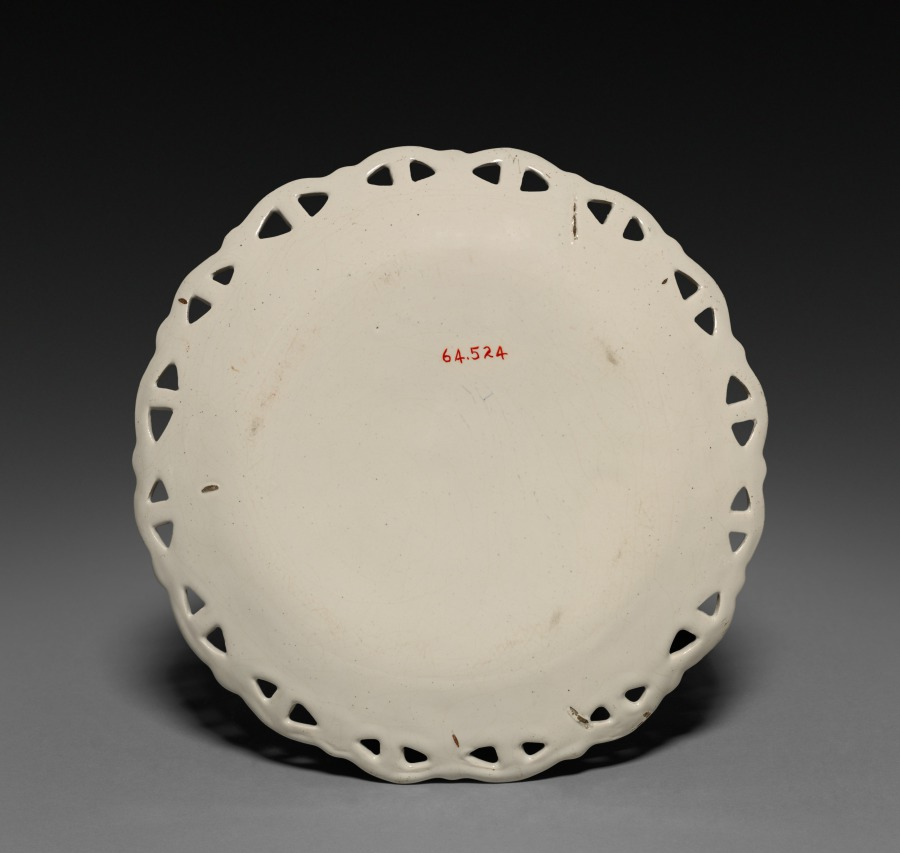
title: Plate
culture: France, Lunéville, 18th century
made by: Lunéville Factory (French)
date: 1775–1780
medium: faience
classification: Ceramic